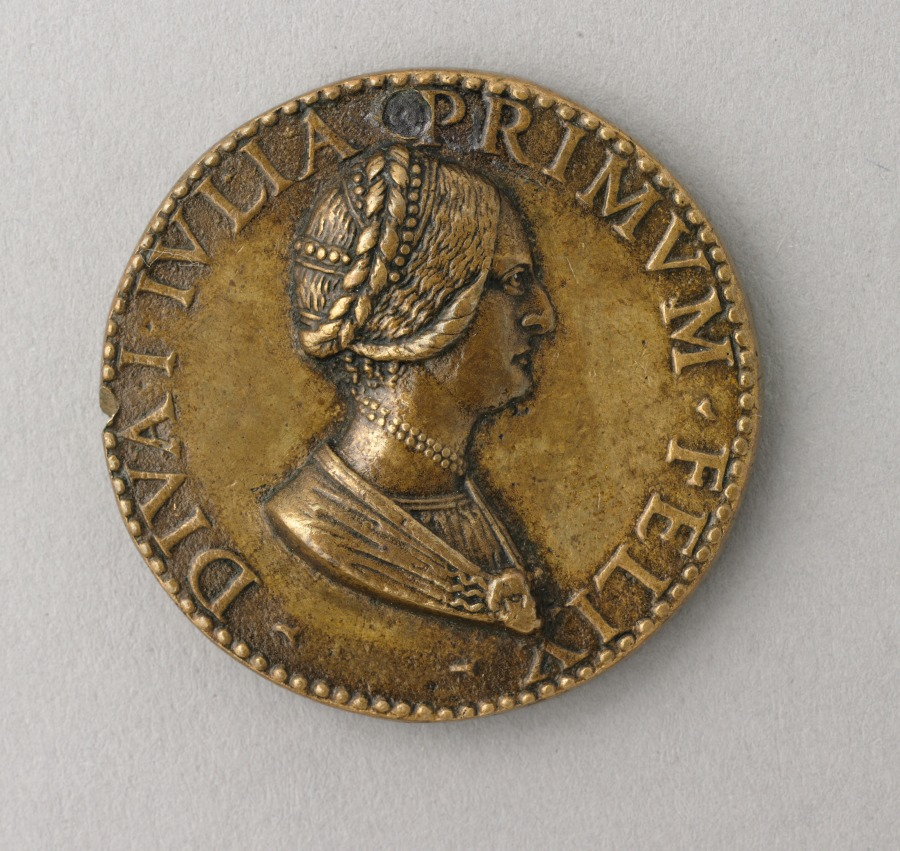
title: Diva Julia (obverse) Dubia Fortuna (reverse)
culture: Italy, 16th century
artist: Antico (Italian, c. 1460–1528)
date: c. 1490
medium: bronze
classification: Sculpture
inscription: DIVAI IVLAI PRIMVM FELIX.